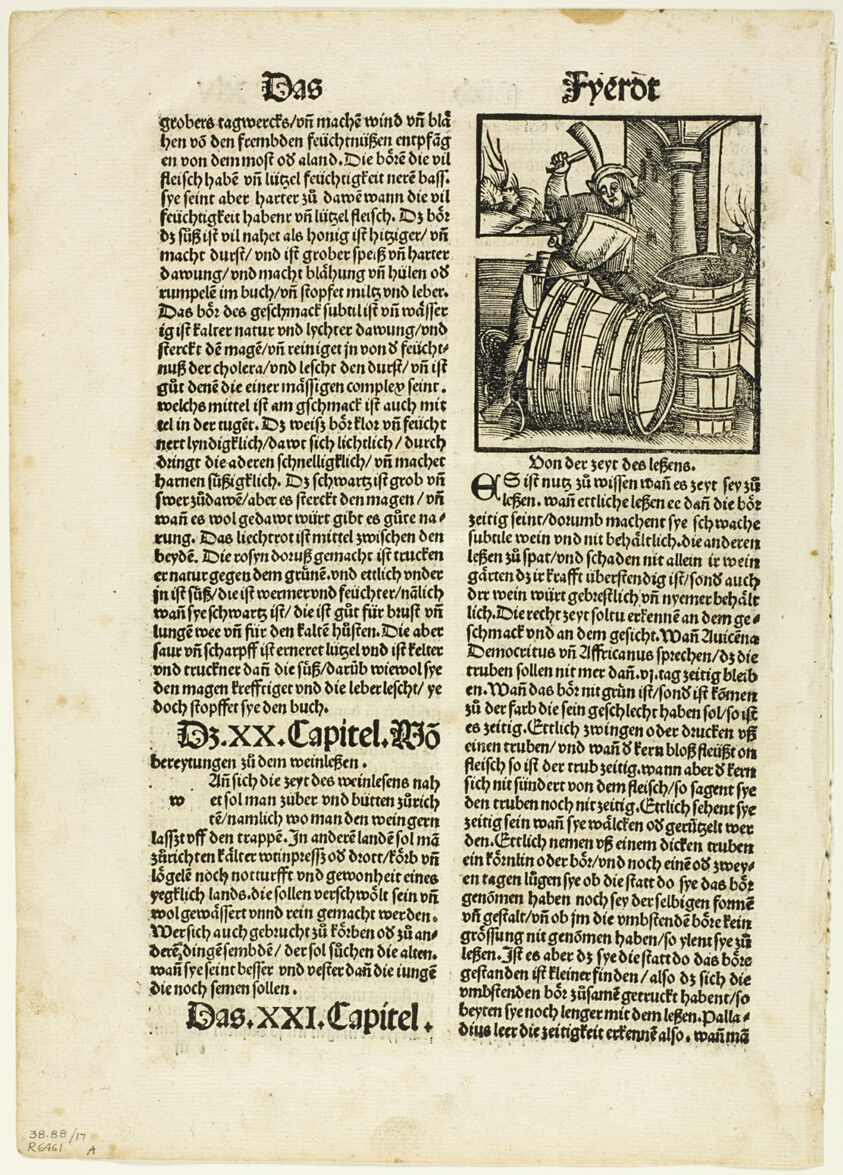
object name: Print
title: Illustration from Von dem nutz der ding, plate seventeen from Woodcuts from Books of the XVI Century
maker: Unknown Artist (German, 16th century); assembled by Max Geisberg (Swiss, 1875-1943)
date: 1518, assembled into portfolio 1937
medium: Woodcut on paper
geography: Germany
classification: woodcut; print; prints and drawing